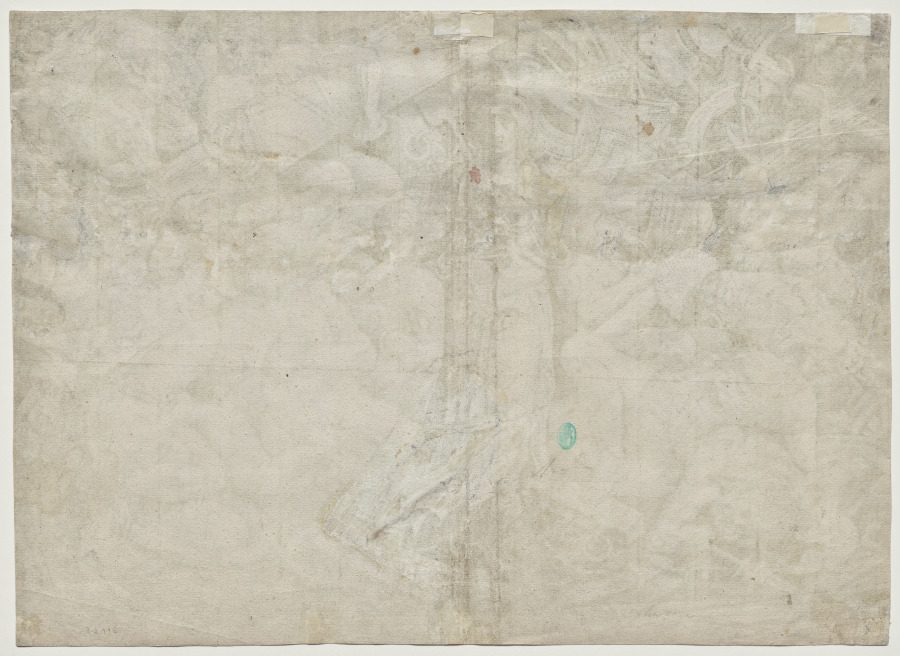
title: Victory Surrounded by Prisoners and Trophies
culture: Netherlands, 16th century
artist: Frans Floris the Elder (Flemish, 1509–1570)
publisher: Hieronymus Cock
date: 1552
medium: etching with engraving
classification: Print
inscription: Unidentified collector’s mark (Lugt 4073), verso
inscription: 3 illegible graphite inscriptions, verso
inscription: In plate, in image lower left recto: “Fra floris fecit / Cock excudubat / 1552”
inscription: Latin verses below image recto: “Haec tibi promisa….de mole Superba.”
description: In Victory Surrounded by Prisoners and Trophies, Frans Floris portrayed a standing female figure in the center, the personification of Victory, surrounded by a multitude of nudes and trophies (or spoils of war), which she has vanquished. The nudes were inspired by Roman friezes as well as figures that Floris had studied on Michelangelo’s Sistine Chapel frescoes during an extended trip to Italy in the 1540s. The etching is based on a painted composition (now lost) that Floris made a few years earlier to adorn a triumphal arch, one of numerous ephemeral arches featured in festive decorations throughout the city mounted for the visit of Charles V and the future Philip II in 1549.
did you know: This is the only etching that the Northern Renaissance painter Frans Floris ever made.